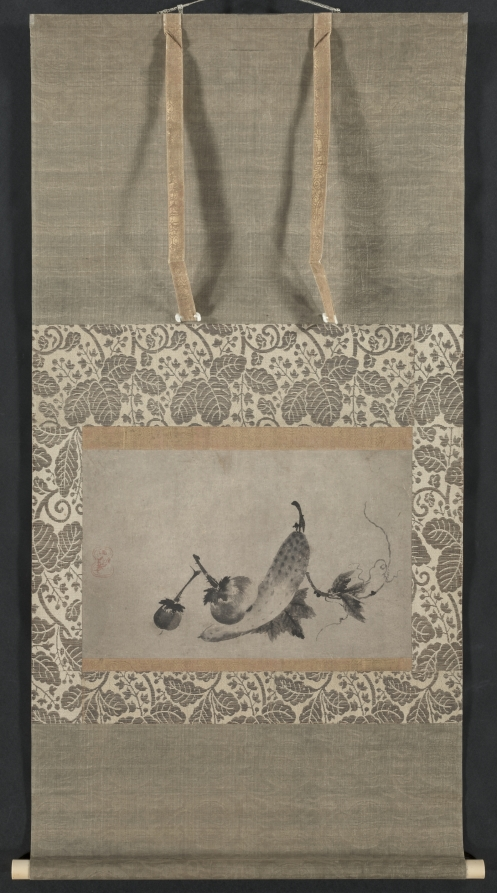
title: Cucumber and Eggplants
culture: Japan, Muromachi period (1392–1573)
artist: Yamada Dōan (Japanese, d. 1571)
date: 1500s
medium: hanging scroll; ink on paper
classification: Painting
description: Still lifes appear frequently in Western painting. This is not the case in East Asian painting traditions. Nevertheless, Zen monastic communities in medieval Japan did like the subject because its outward, "simple" appearance camouflaged the skills required to portray the subject convincingly.